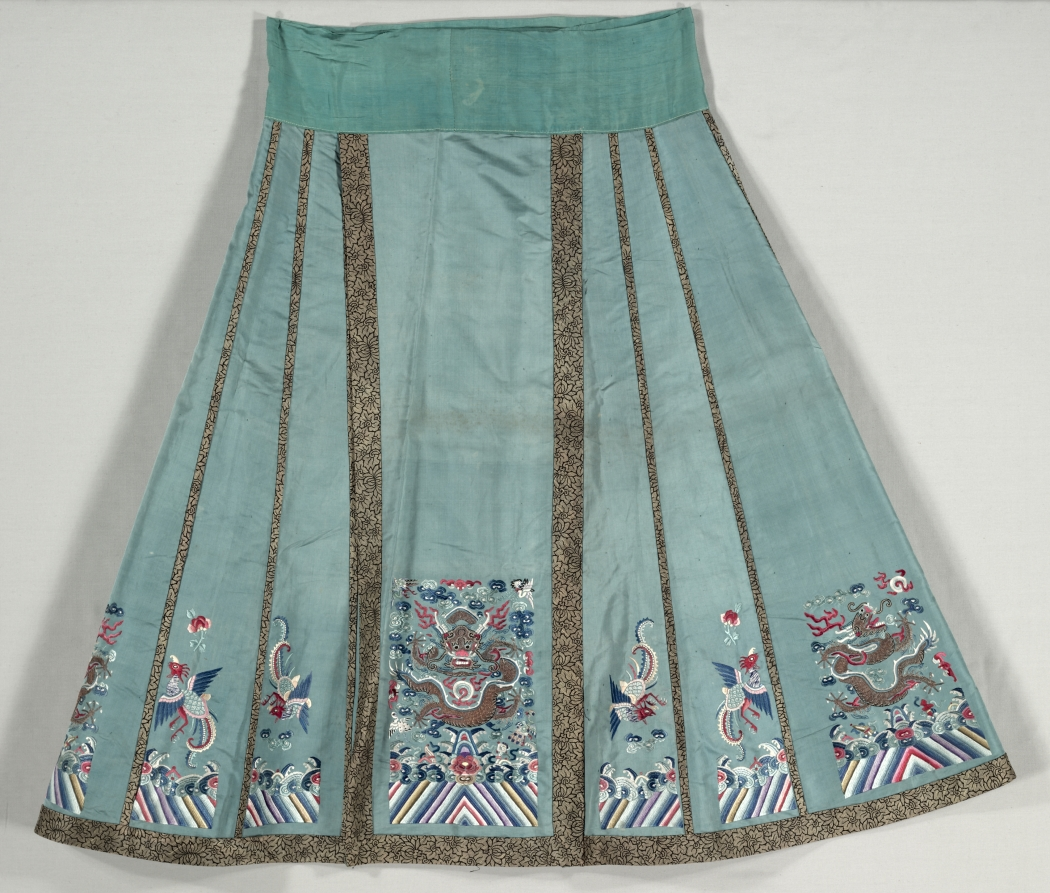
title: Woman's Bridal Dress, Pleated Skirt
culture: China, Qing dynasty (1644-1911)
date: 1800s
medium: Silk, gilt-metal thread; embroidery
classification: Garment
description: This three-piece bridal dress includes a dragon jacket, a pleated skirt, and a tabard, a short loose-fitting sleeveless vest. The ensemble reveals the high rank of her husband even though it did not fall under the scope of the Qing Dynasty sumptuary laws. The pleated turquoise skirt, with six embroidered panels that feature dragons in the front and back, would be worn beneath the red dragon jacket (2005.135.1).